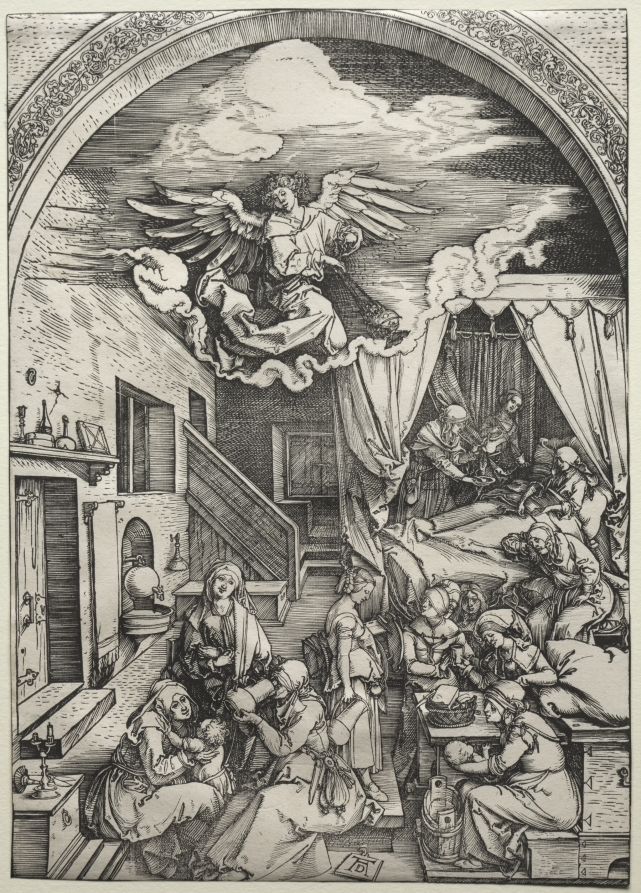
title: The Birth of the Virgin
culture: Germany, early 16th Century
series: The Life of the Virgin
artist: Albrecht Dürer (German, 1471–1528)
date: c. 1503–1504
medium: woodcut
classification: Print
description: Dürer devoted three woodcuts (1959.99.5-7) to the significant events in Mary’s youth prior to her sacred calling. His depiction of her birth recalls a contemporary birthing scene, complete with midwives, female friends, and relatives. Anna rests from her efforts in the background while an attendant bathes the infant Mary in the immediate right foreground. The religious significance of the event is made known by the presence of an angel above. In the subsequent prints Mary is presented several years later at the temple (running up the stairs), followed by her betrothal to an older widowed man named Joseph.